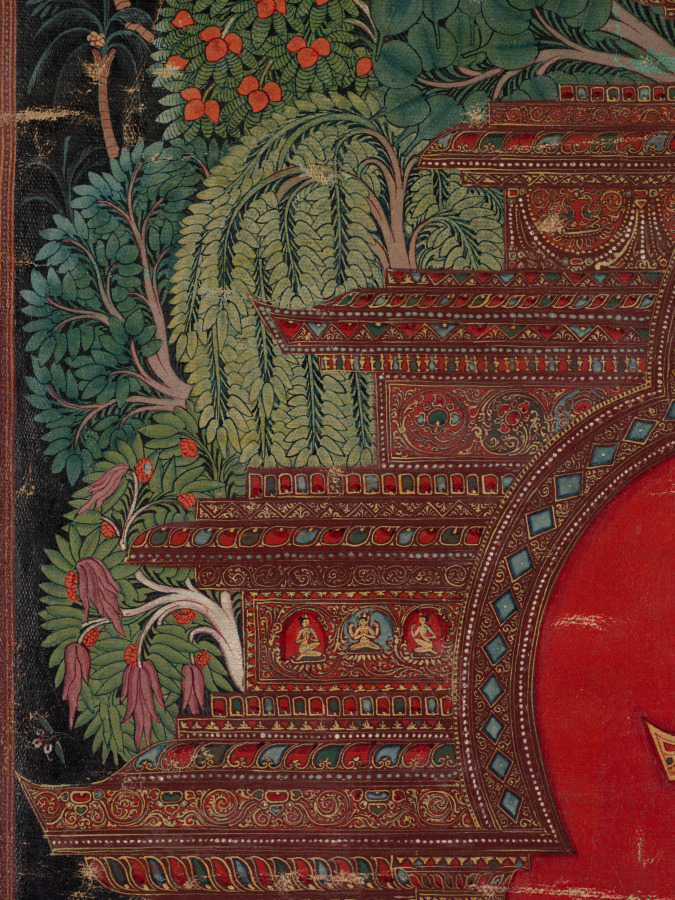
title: Green Tara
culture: Central Tibet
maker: attributed to Aniko (Nepalese, active in Tibet mid- to late 1200s)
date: c. 1260s; mounted, 2020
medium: thangka; gum tempera, ink, and gold on sized cotton; mount: silk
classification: Painting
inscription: Om Ah Hum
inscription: om tare tutare ture svaha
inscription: Om Ah Hum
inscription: Om Ah Hum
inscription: om ah sarva vyida svaha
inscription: ye dharmā hetuprabhavā he- tuṃ teṣāṃ tathāgato hy avadat teṣāṃ ca yo nirodha evaṃvādī mahāśramaṇaḥ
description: For Tibetans, Green Tara is one of the preeminent figures of their Buddhist faith, a radiant savioress who embodies the female form of the perfect, enlightened mind. The Green Tara in the Cleveland thangka—a Tibetan devotional painting on cloth—specifically dispels fear and provides protection, just like her mantra inscribed on the back side of the painting. Her green color and fear-not gesture link her to the cosmic Buddha of the North, enshrined above her head. Most scholars agree that this work was painted by the celebrated Nepalese artist known as Aniko.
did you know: The tiny monastic figure under Green Tara's right hand commissioned the painting.